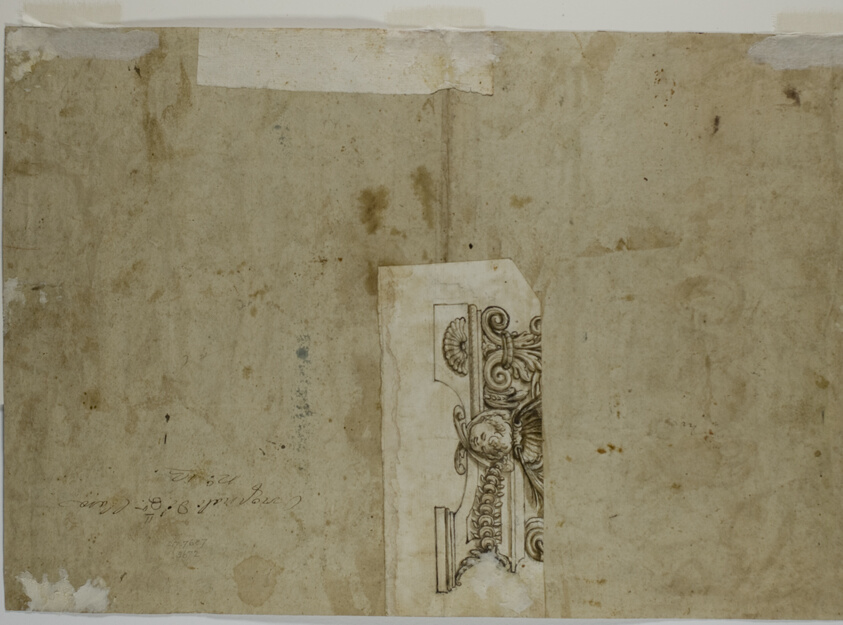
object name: Drawing and Watercolor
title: Moses and the Brazen Serpent (recto); Ornamental Base (verso)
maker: Recto attributed to Tommaso Vincidor (Italian, died c. 1536); Verso by Unknown Artist (Italian, 17th century)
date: 1530 (recto); 1600/99 (verso)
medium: Pen and brown ink with brush and gray wash, on cream laid paper prepared with blue wash (recto), and pen and brown ink with brush and brown wash over graphite on cream paper laid down on cream laid paper (verso)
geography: Italy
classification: ink with wash; drawings (visual works); prints and drawing